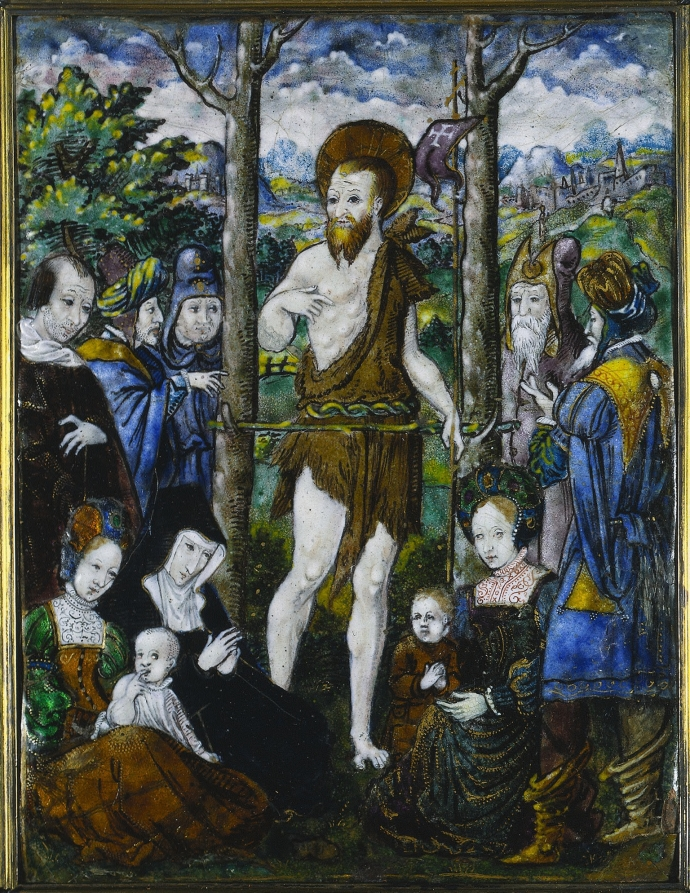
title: Preachment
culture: France, 16th century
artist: circle of Léonard Limousin (French, c. 1505–1577)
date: 1500s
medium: painted enamel on copper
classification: Enamel